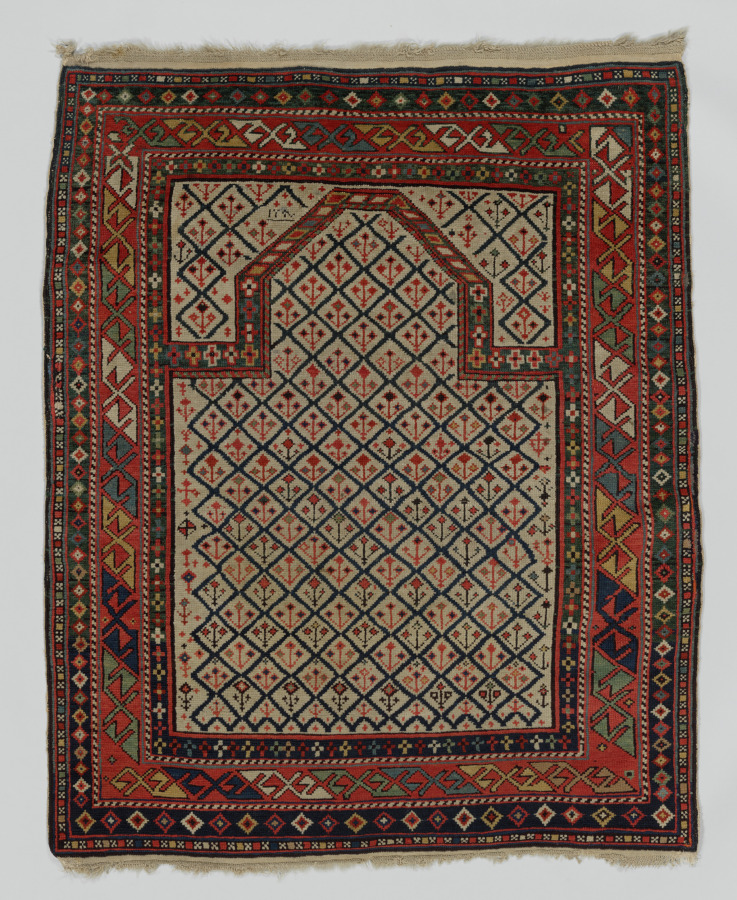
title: Prayer Rug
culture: Caucasus, Daghestan, 19th century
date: c. 1800s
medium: wool and linen; ghiordes knot, extended tabby, fringe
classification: Carpet